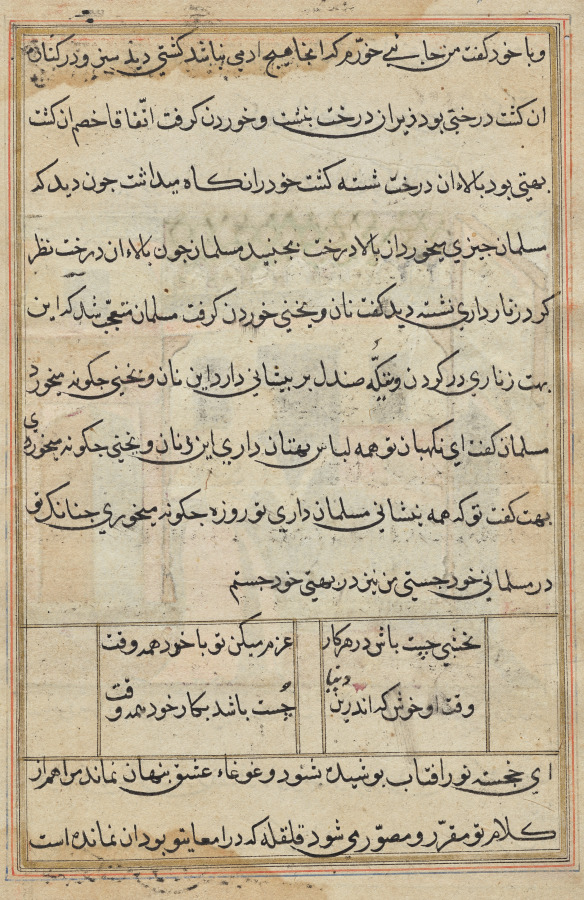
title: Page from Tales of a Parrot (Tuti-nama): text page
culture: Mughal India, court of Akbar (reigned 1556–1605)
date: c. 1560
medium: gum tempera, ink, and gold on paper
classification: Painting